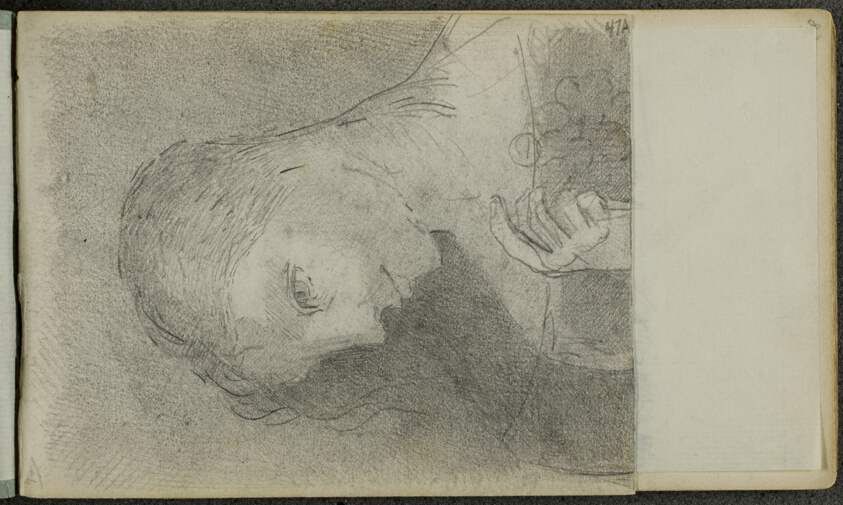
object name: Book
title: Sketchbook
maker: Odilon Redon (French, 1840-1916)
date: c. 1879–85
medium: 55-page sketch book of drawings in pencil on cream wove (with a few buff and blue) paper, with (simulated) laid paper interleaves, bound in black cardboard with black fabric taping on spine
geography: France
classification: sketchbook; graphite; prints and drawing; book; paper